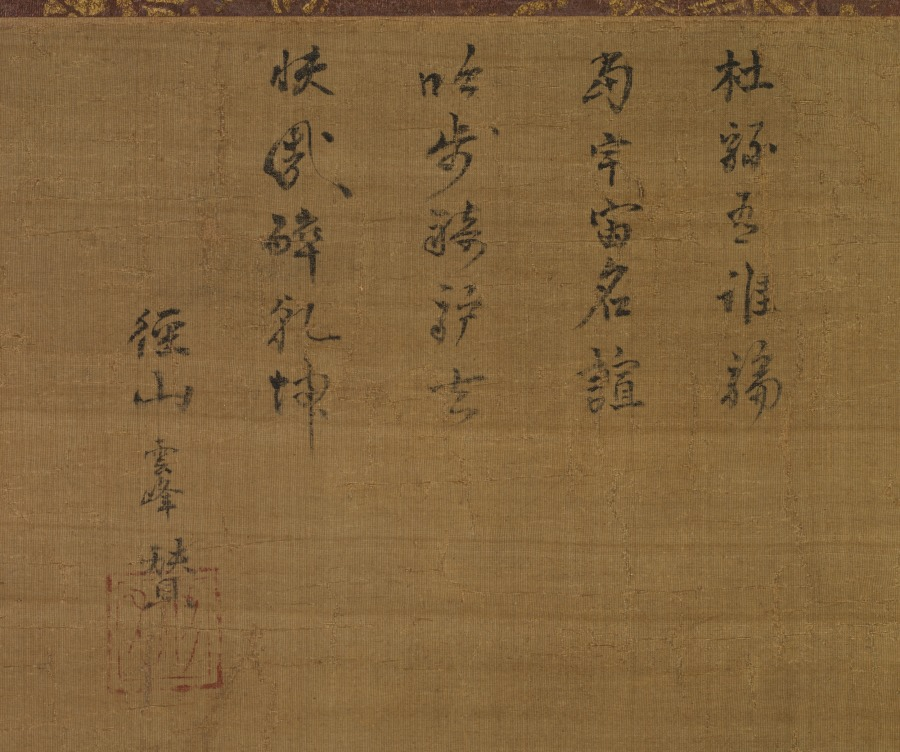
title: Mountain Landscape in Moonlight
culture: China, Southern Song dynasty (1127–1279) to Yuan dynasty (1271–1368)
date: 1200s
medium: hanging scroll; ink on silk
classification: Painting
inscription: 2 unidentified seals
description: Painted in modulated monochrome ink washes with dark dots for foliate accents, the anonymous artist successfully suggests the dense atmosphere of a warm summer night. Under a full moon a scholar rides a mule, accompanied by a servant who carries his belongings. The poem inscribed by Chan (Zen) priest Yunfeng Miaogao identifies the figure as the Tang dynasty poet Du Fu 杜甫 (712–770). Who rides Du [Fu]'s mule: Through the universe his name resounds. Chanting poems as he rides off on his mule, How quickly does he become drunk with Heaven and Earth!